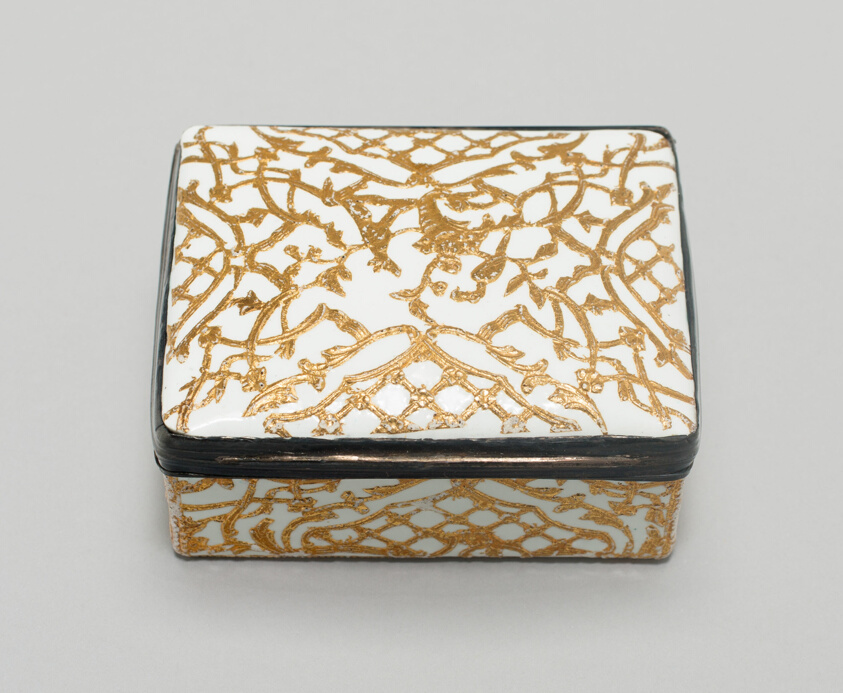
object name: Metalwork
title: Snuff Box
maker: Possibly the workshop of Pierre Fromery (Prussian, born France, 1644-1738)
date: c. 1740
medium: Metal, enamel, and gold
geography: Berlin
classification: snuff box; porcelain; ceramics; european decorative arts; metalwork